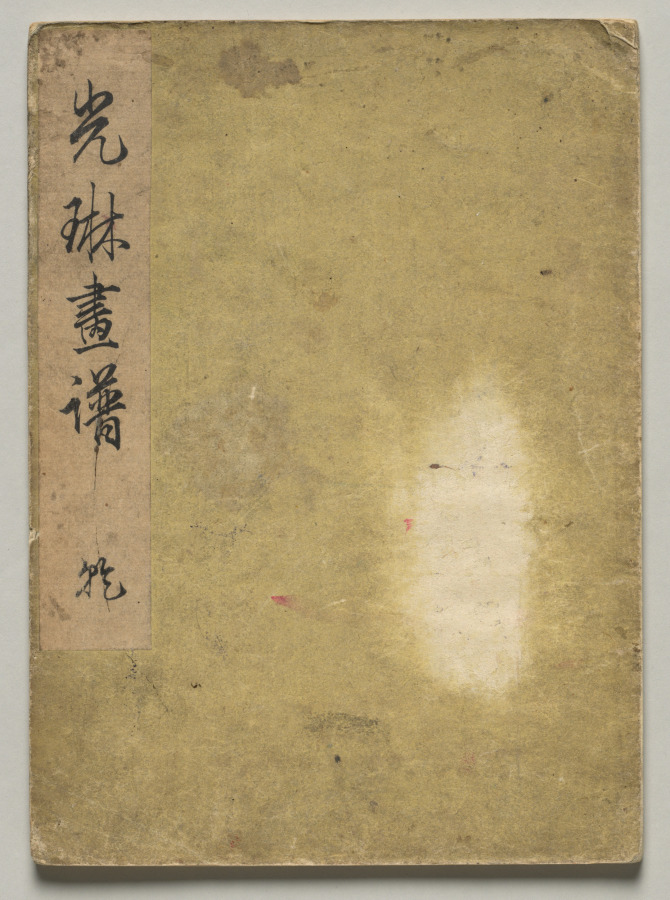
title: The Kōrin Picture Book (Volume 2)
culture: Japan, Edo period (1615–1868)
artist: Nakamura Hōchū (Japanese, d. 1819)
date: 1800s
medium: One of a set of two woodblock printed folding-books; ink and color on paper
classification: Bound Volume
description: Ogata Korin (1658-1716) was one of the most admired artists of Rimpa, or "decorative school painting." These books by the charming later-generation Rimpa artist Hochu record Korin's inventive designs.